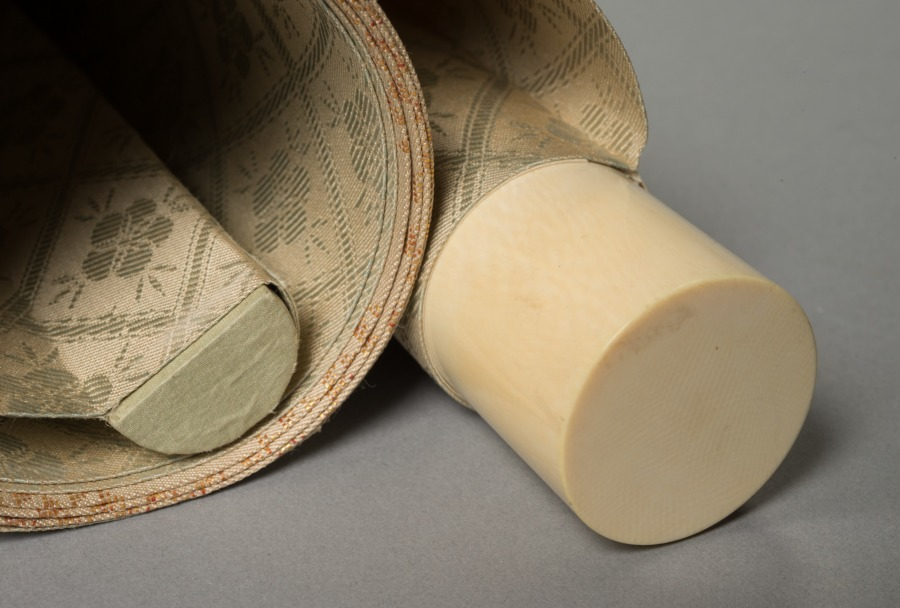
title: Spring Dance Scene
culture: Japan, Edo period (1615–1868)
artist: attributed to Hishikawa Moronobu (Japanese, c. 1618–1694)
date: mid- to late 1600s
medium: hanging scroll; ink and color on silk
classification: Painting